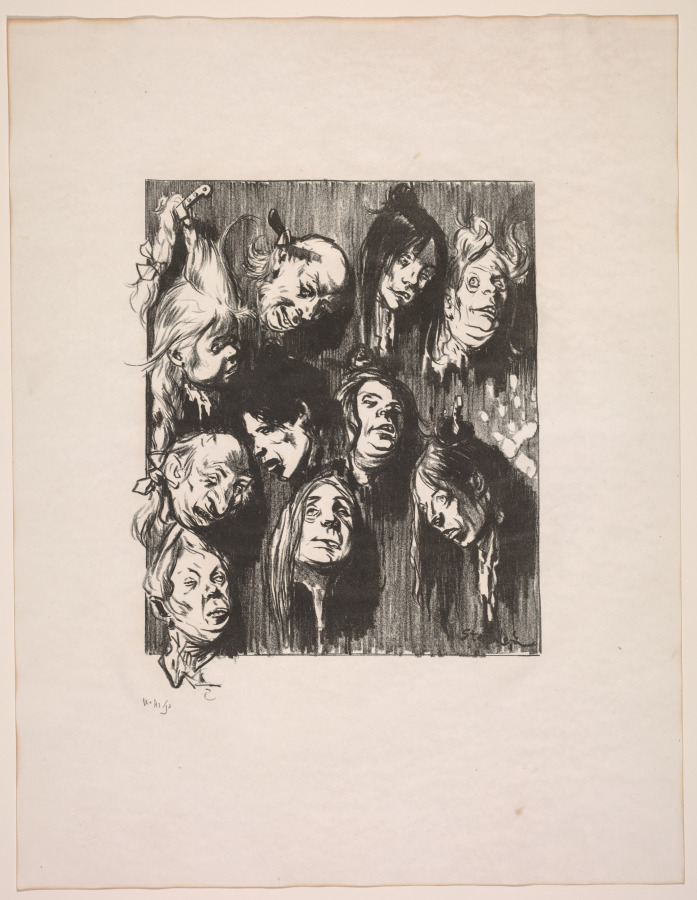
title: Ten Assassinations for a Penny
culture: Switzerland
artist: Théophile Alexandre Steinlen (Swiss, 1859–1923)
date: 1897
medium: lithograph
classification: Print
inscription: in pencil, lower left margin: No 41/50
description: Nineteenth-century French lithographs, including Steinlen’s charged political images, offer wide-ranging documentation of the life at the time. In 1881 France passed a law granting freedom of the press, resulting in numerous magazines of humor and social criticism. An advocate for the poor, the downtrodden, and the working classes, Steinlen contributed artwork to journals linked to the leftist movement, such as the anarchist publication La feuille (The Newspaper), in which Ten Assassinations for a Penny was reproduced. Steinlen’s illustrations for La feuille comment satirically on the articles written by Zo d’Axa, the editor-in-chief. A sense of gloom and violence that parallels the pessimism of the writing permeates the somber images. Marked by strong contrasts of black and white, Ten Assassinations for a Penny has an unsettling, even frightening quality intended to shock the reader into acknowledging the deep-seated problems in French society.